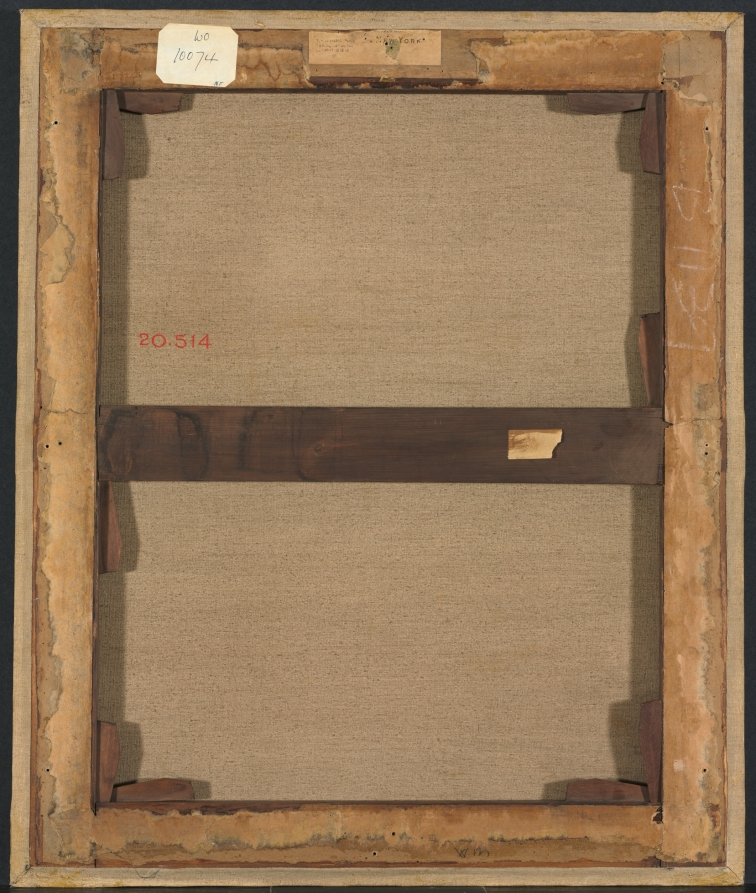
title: Portrait of Mrs. George Collier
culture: England, 18th century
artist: follower of Joshua Reynolds (British, 1723–1792)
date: 18th century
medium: oil on canvas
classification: Painting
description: Given to the Cleveland Museum in 1920 by the collector Jeptha H. Wade, this painting was thought to be an authentic work by Joshua Reynolds. However, after considerable study, the museum attributed it to a follower of Reynolds working in a similar style around the same time. This portrait depicts the wife of the captain (and later admiral) George Collier. The artist draws an analogy between this woman and Lesbia, a married woman who provided much artistic inspiration for the Roman poet Catullus (c. 84–c. 54 BC). The poet's writings document a love affair with Lesbia, and one poem in particular documents the death of the woman's beloved pet sparrow. The viewer can barely see the sparrow in this painting, since it lies on a table partially obscured by her right elbow. The muted colors evoke a sense of melancholy as the woman mourns with her head turned away from the viewer.